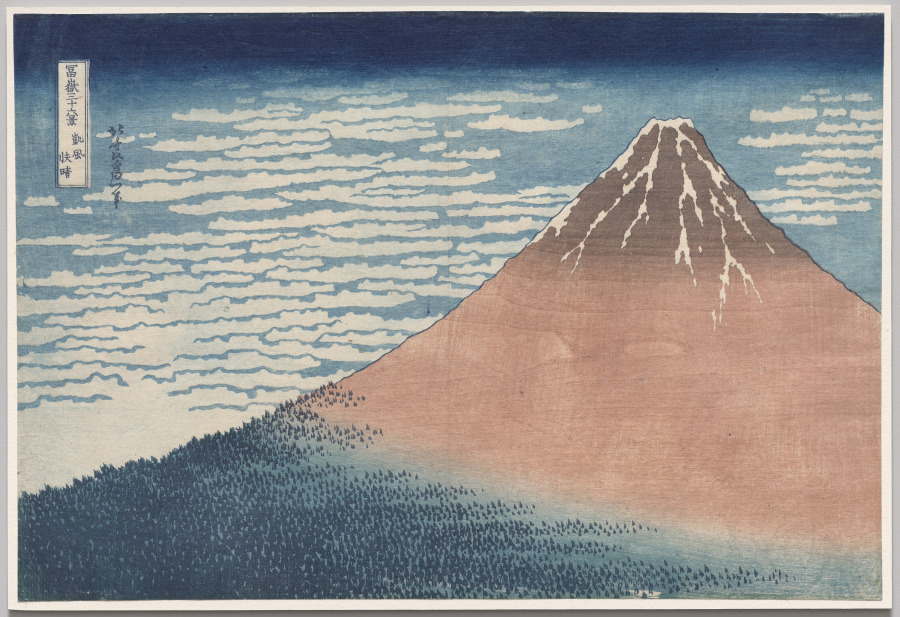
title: South Wind, Clear Sky, from Thirty-Six Views of Mount Fuji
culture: Japan, Edo period (1615–1868)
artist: Katsushika Hokusai (Japanese, 1760–1849)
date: early 1830s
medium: color woodblock print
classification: Print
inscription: Signature: Hokusai aratame Iitsu hitsu Publisher: Nishimuraya Yohachi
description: Mt. Fuji, Japan’s highest mountain, appeared in most Japanese 19th-century travel literature. Maps sometimes showed its location with a Fuji-shaped icon and indicated where travelers could get the best view of it. Between 1829 and 1833, Hokusai created a print series depicting thirty-six views of the mountain, including this one, sometimes known as “Red Fuji.” The season in this scene is a time between late summer and early autumn, when the mountain takes on a reddish hue.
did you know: During the printing process, the natural grain of the cherry wood printing block was imprinted onto the paper along with the red-colored dye.